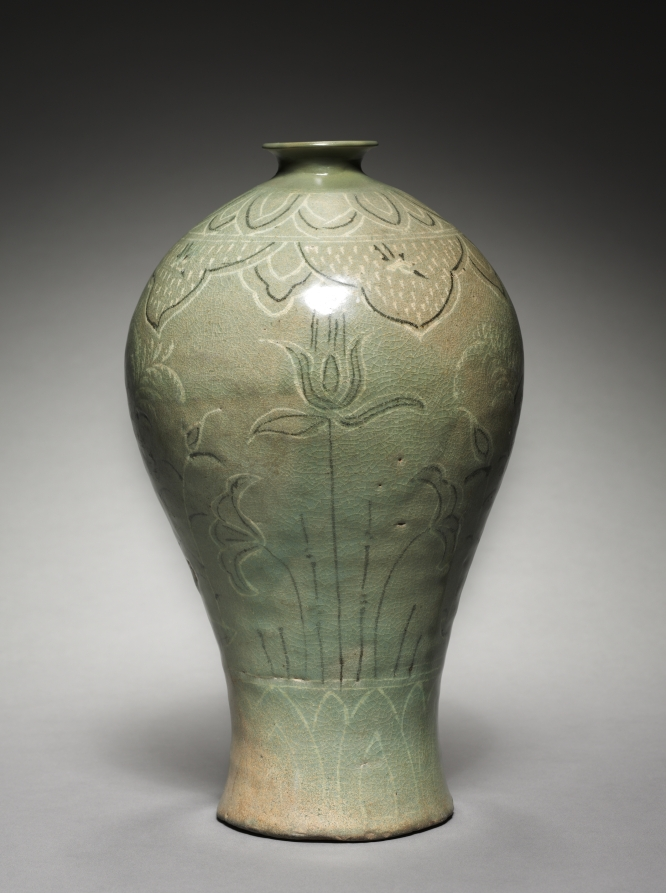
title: Prunus Vase with Inlaid Lotus and Reed Design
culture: Korea, Goryeo dynasty (918–1392)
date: 1300s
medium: Celadon ware with inlaid white and black slip decoration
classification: Ceramic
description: As early as the seventh century, the practice of drinking tea and wine became an important part of elite culture in Korea. Once used to store alcoholic beverages, this type of vase features a wide body followed by a sharply rounded shoulder, a short neck and a small opening. Most of the remaining examples no longer have a lid, but originally it may have had a lid that not only covers the opening, but also served as a cup.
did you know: Prunus vases are often believed to contain a branch of plum blossoms, but recent research reveals that these lidded vases were also used to contain cooking liquid such as sesame oil.